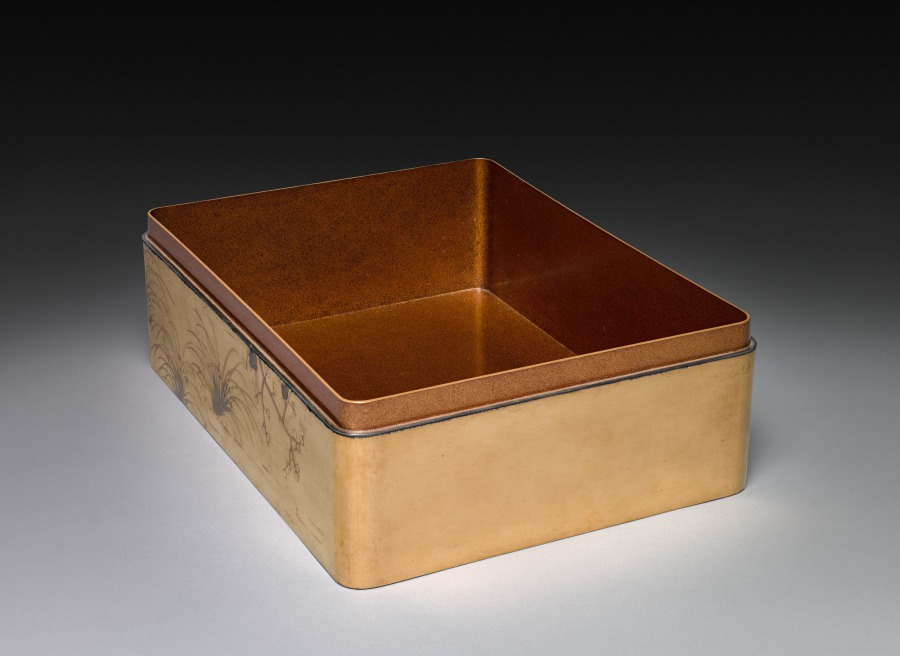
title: Document Box (Ryōshibako) with Chrysanthemum and Plum (base)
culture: Japan, Meiji period (1868–1912)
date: late 1800s-early 1900s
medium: gold lacquer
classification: Lacquer